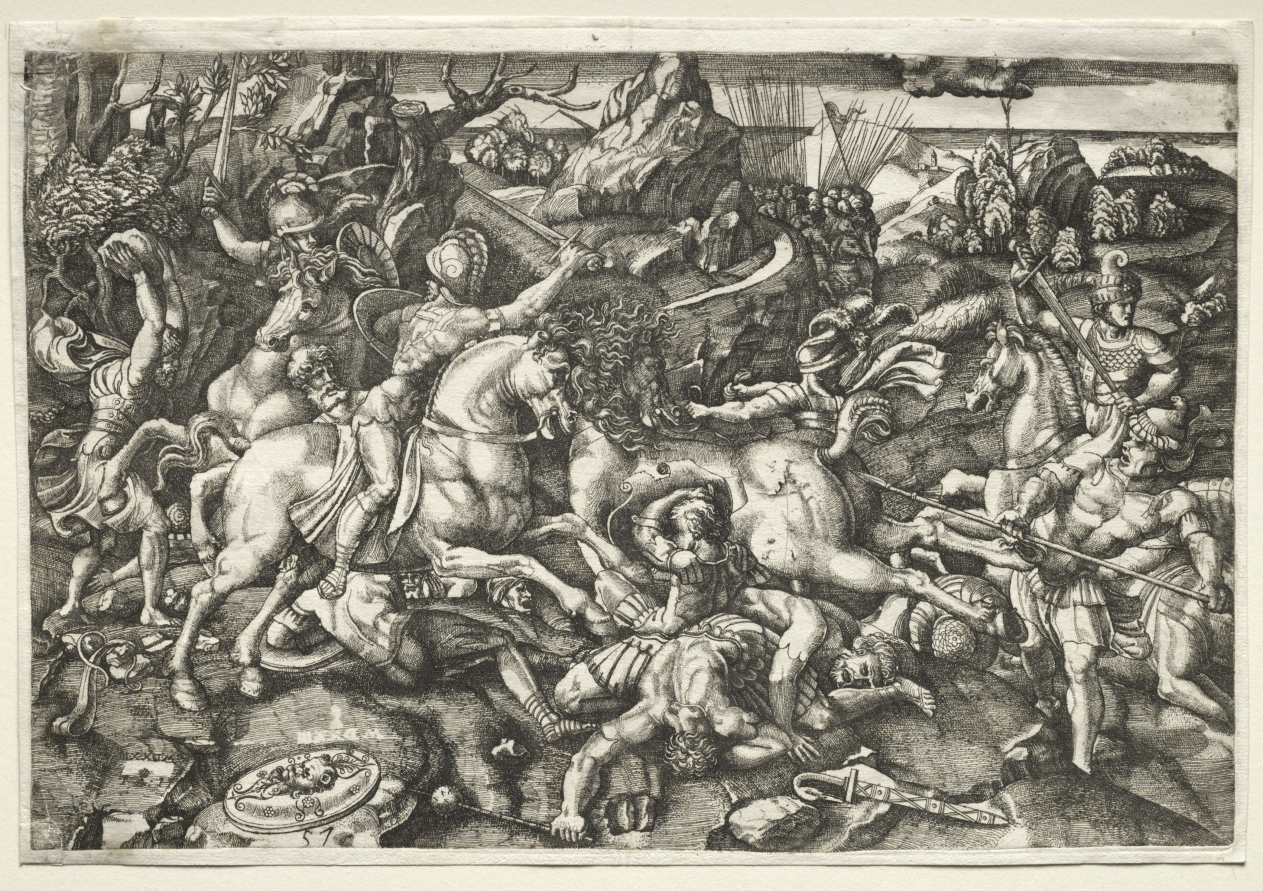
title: Combat between horsemen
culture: Germany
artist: Hieronymus Hopfer (German)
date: 1523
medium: etching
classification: Print